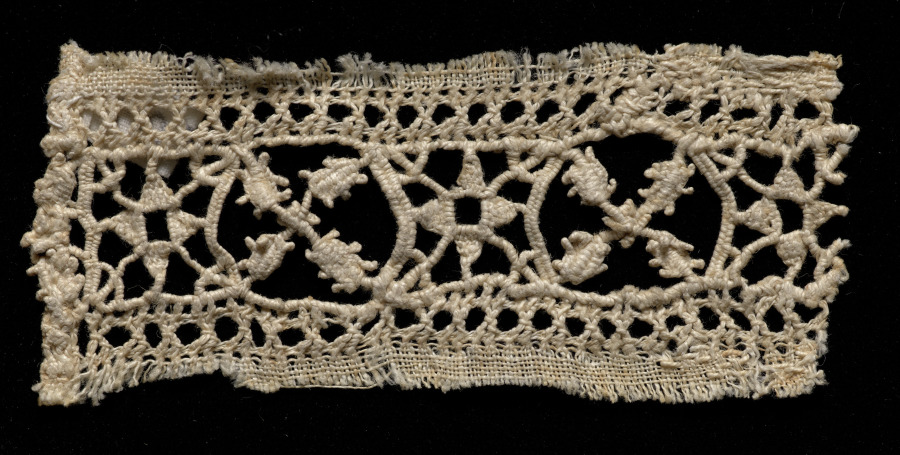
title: Lace Fragment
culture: Italy, 1600s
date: 1600s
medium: Linen: needle lace (Reticella) insertion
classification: Lace